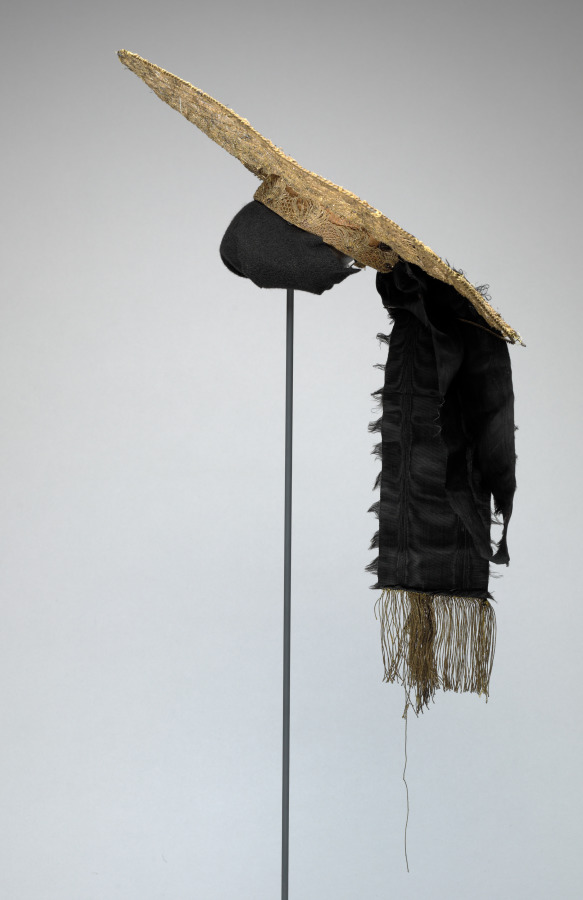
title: Bonnet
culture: Germany, Early 20th Century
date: early 1900s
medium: lace, wire, tinsel, moire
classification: Garment